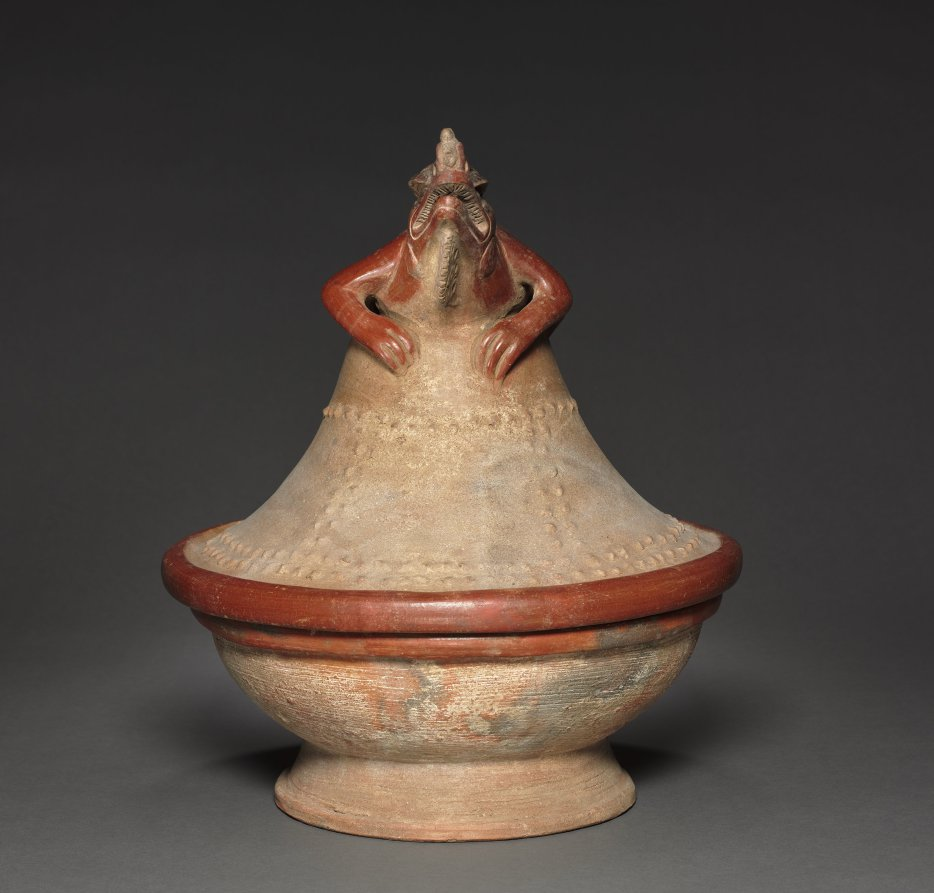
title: Lidded Bowl with Iguana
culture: Costa Rica, Southern Nicoya region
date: c. 600–1100 (Thermoluminescence date, 995–1395)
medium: ceramic, slip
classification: Ceramic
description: At the time of the Spanish conquest in the 16th century, Costa Rican mythology linked iguanas to the sky and to rulers. The earlier makers of this vessel left no written records, but they may have had similar beliefs. The lizard poses as though basking in the sun, a celestial body, and assumes an aggressive stance that could be likened to a ruler's: the teeth and chin under the dewlap are displayed, Also, fine ceramics like this were buried in the graves of the high-status dead, some of them certainly leaders of the several groups that competed in the area.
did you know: Green iguanas can grow to be over 6 feet long.